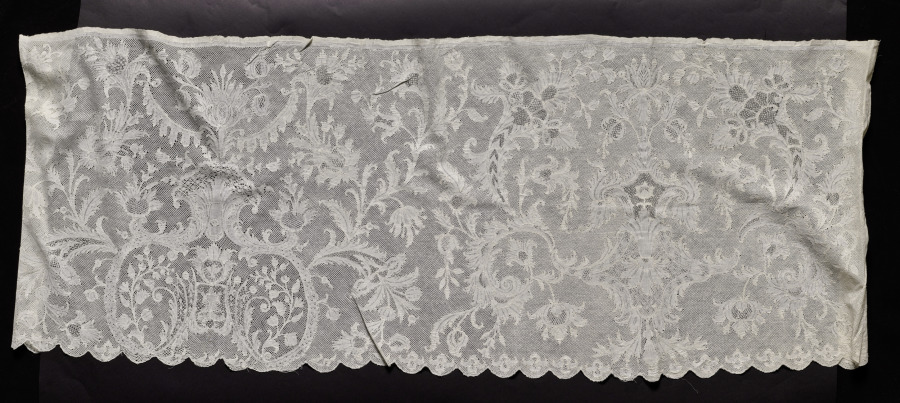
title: Lace Flounce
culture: Belgium (Flanders)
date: 1700–1720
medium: Linen: bobbin lace (mesh ground)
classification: Lace